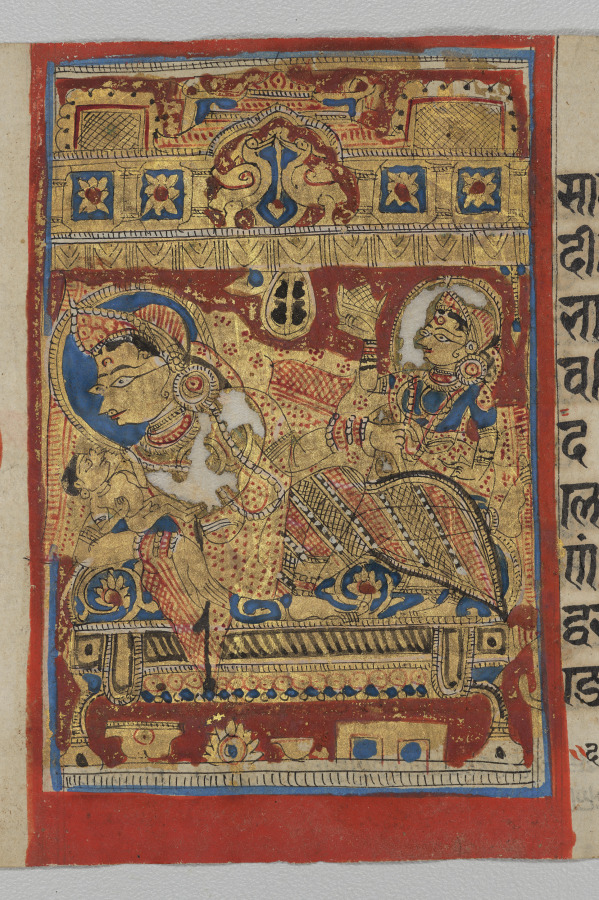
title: Birth of Nemi, Folio 48 (verso), from a Kalpa-sutra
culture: Western India, Gujarat, last quarter of the 15th century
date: c. 1475–1500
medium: Gum tempera, ink, and gold on paper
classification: Painting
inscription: [[upper left]] Śrī Nemi janma